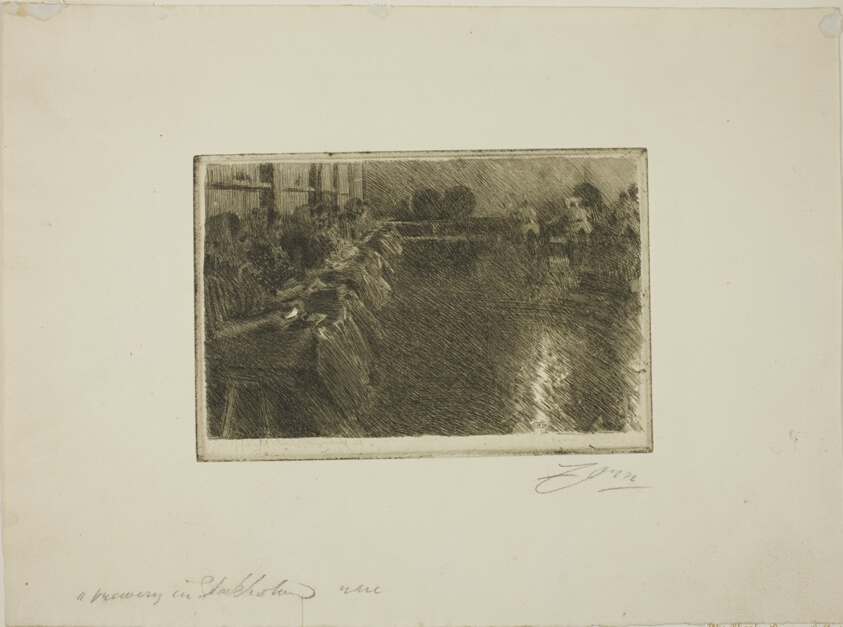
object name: Print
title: The Large Brewery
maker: Anders Zorn (Swedish, 1860-1920)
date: 1890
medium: Etching on ivory laid paper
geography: Sweden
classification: etching; print; prints and drawing